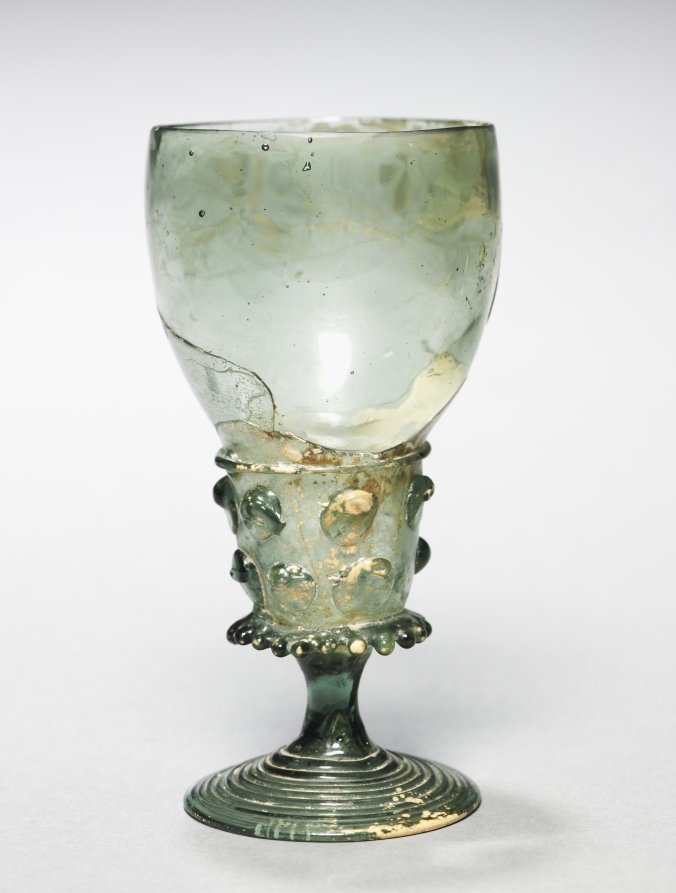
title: Goblet (Berkemeyer)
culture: Germany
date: c. 1525–50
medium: green glass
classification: Glass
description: Green goblets were frequently used for white wine, since the color was thought to enhance the wine’s golden shade. This goblet ornamented with prunts, or glass blobs, has a funnel-shaped mouth and was typical of German and Netherlandish manufacture in the 1500s and 1600s. The green color, caused by iron impurities in the local sand, is typical of Waldglas (“forest glass” in German), made in the forests of Central Europe.